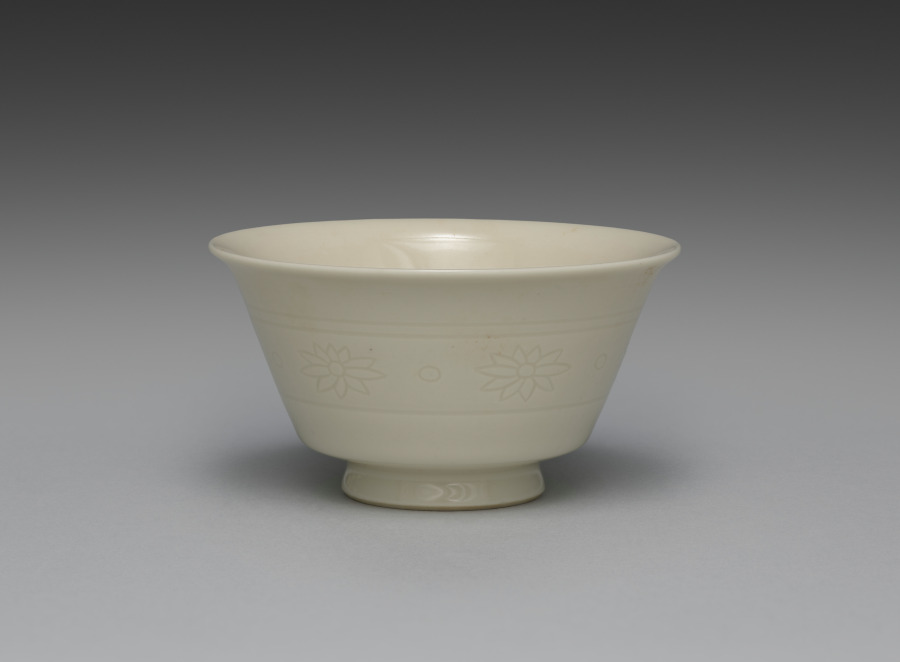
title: Teacup from Teacups with Floral Band Motif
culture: Japan, Meiji period (1868–1912)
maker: Seifū Yohei III (Japanese, 1851–1914)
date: 1893–1914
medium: One from a set of five cups; porcelain with incised decoration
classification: Ceramic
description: The five sencha teacups in this set are decorated with incised flowers and dots between a double band at the top and a single band at the bottom. They are in Yohei III’s creamy taihakuji body and glaze. In their motifs, they are quite similar to an incense burner by Yohei III (see CMA 2022.180), but the flowers are even more simple in design, with no open circle at the center. A label affixed to the side of the box refers to them as “sencha cups in emulation of Korean white [ware].” The reference to Korean ware indicates that even though Yohei was more directly inspired by Qing-dynasty wares from the Dehua kilns in Fujian Province in developing his porcelain clay and glaze for works such as these, the general understanding of the continental models still placed them, at least in terms of color, among pieces broadly associated in Japan with Korean white wares. The delicate cups are thinly potted, so they have a highly desirable translucency.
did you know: The delicate cups in this set are thinly potted, so they have a highly desirable translucency.